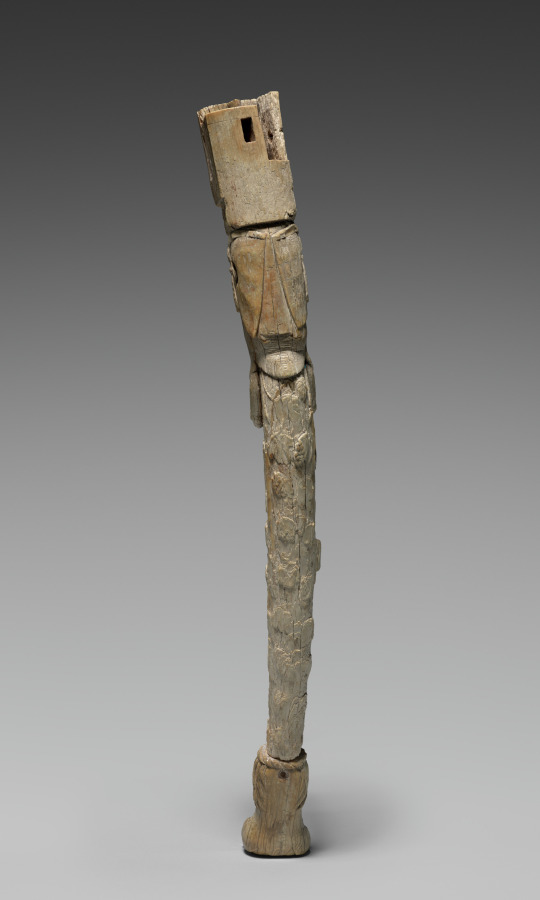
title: Chair Leg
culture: Afghanistan, Begram, Kushan period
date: 300s CE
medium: ivory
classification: Ivory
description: This ivory carving was made to sheath wooden furniture made in India for trade along the Silk Road, which stretched from Rome to China. Indian ivory-faced furnishings--along with lacquer boxes from China and painted glass from Rome--were found in an extraordinary deposit of luxury goods at a site called Begram. The wood on which the ivory and lacquer were affixed has long disintegrated, and only the small pieces remain.